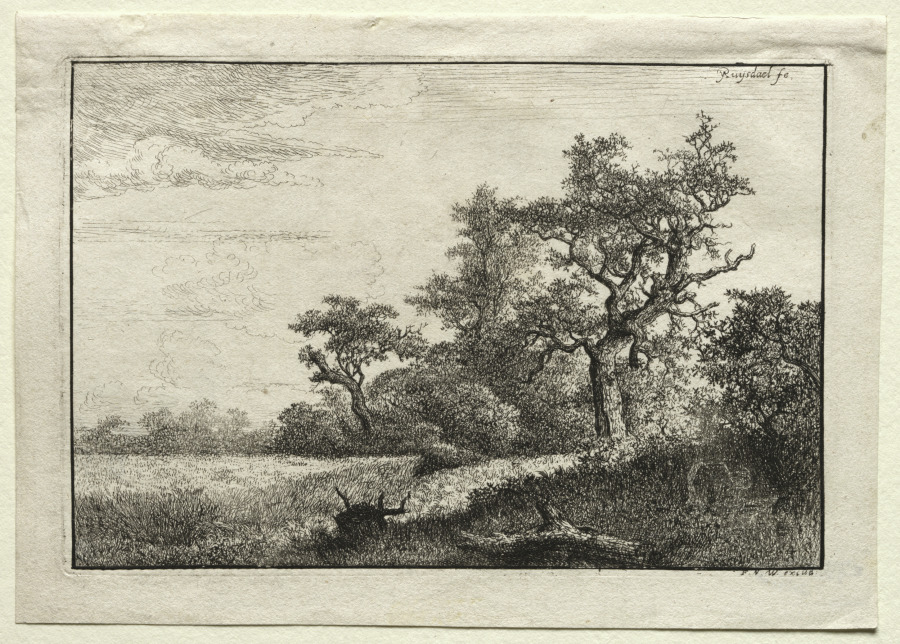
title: The Wheat Field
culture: Netherlands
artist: Jacob van Ruisdael (Dutch, 1628/29–1682)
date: 1648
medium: etching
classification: Print